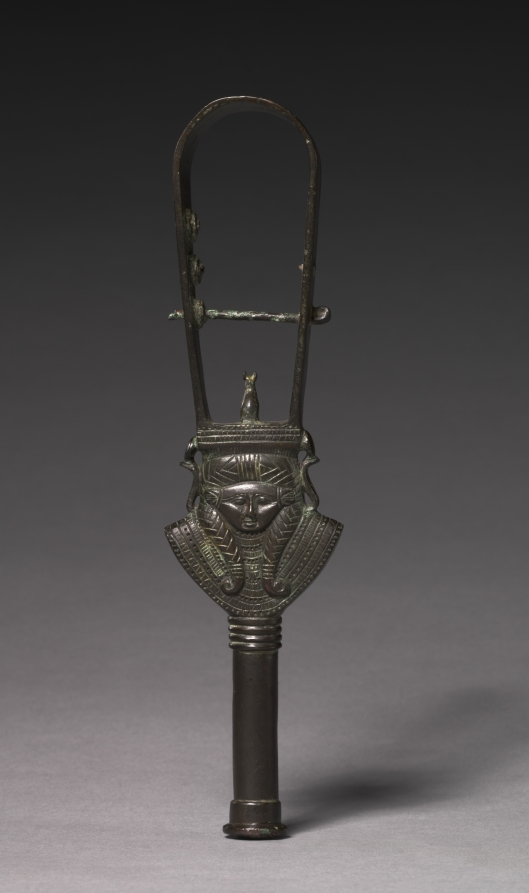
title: Arched Sistrum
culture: Egypt, Late period (715–332 BCE), Dynasty 30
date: 380–343 BCE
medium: bronze, hollow cast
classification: Implements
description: A sistrum is a musical rattle. Metal disks strung on wires along the arched upper end of the sistrum produced a rustling sound that was supposed to have a calming effect on the nerves of various deities, especially the goddesses Hathor and Bastet. Appropriately, this example is decorated with a Hathor head (a woman with cow’s ears) and a cat (the image of Bastet). These instruments are particularly associated with women, who played them as members of a temple choir.